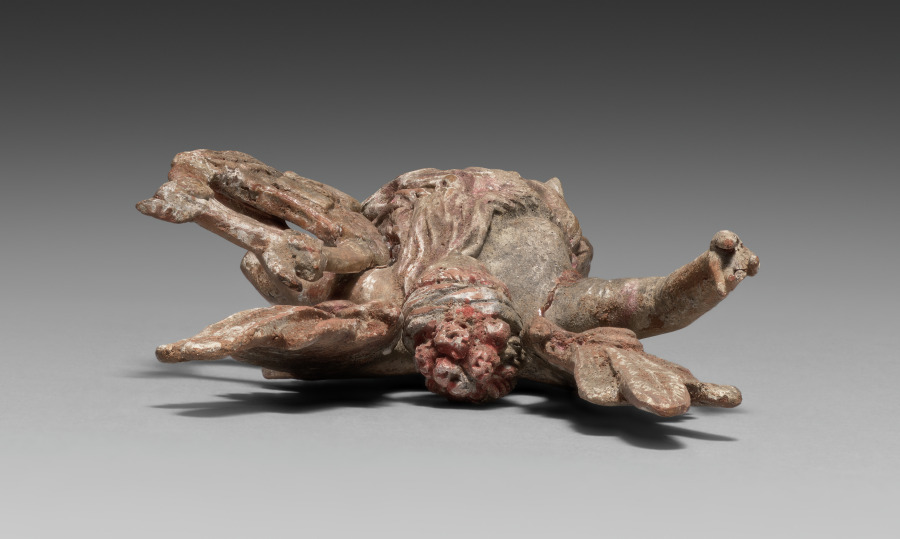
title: Figurine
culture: Greece, Myrina, Hellenistic period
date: 300–100 BCE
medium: terracotta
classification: Sculpture